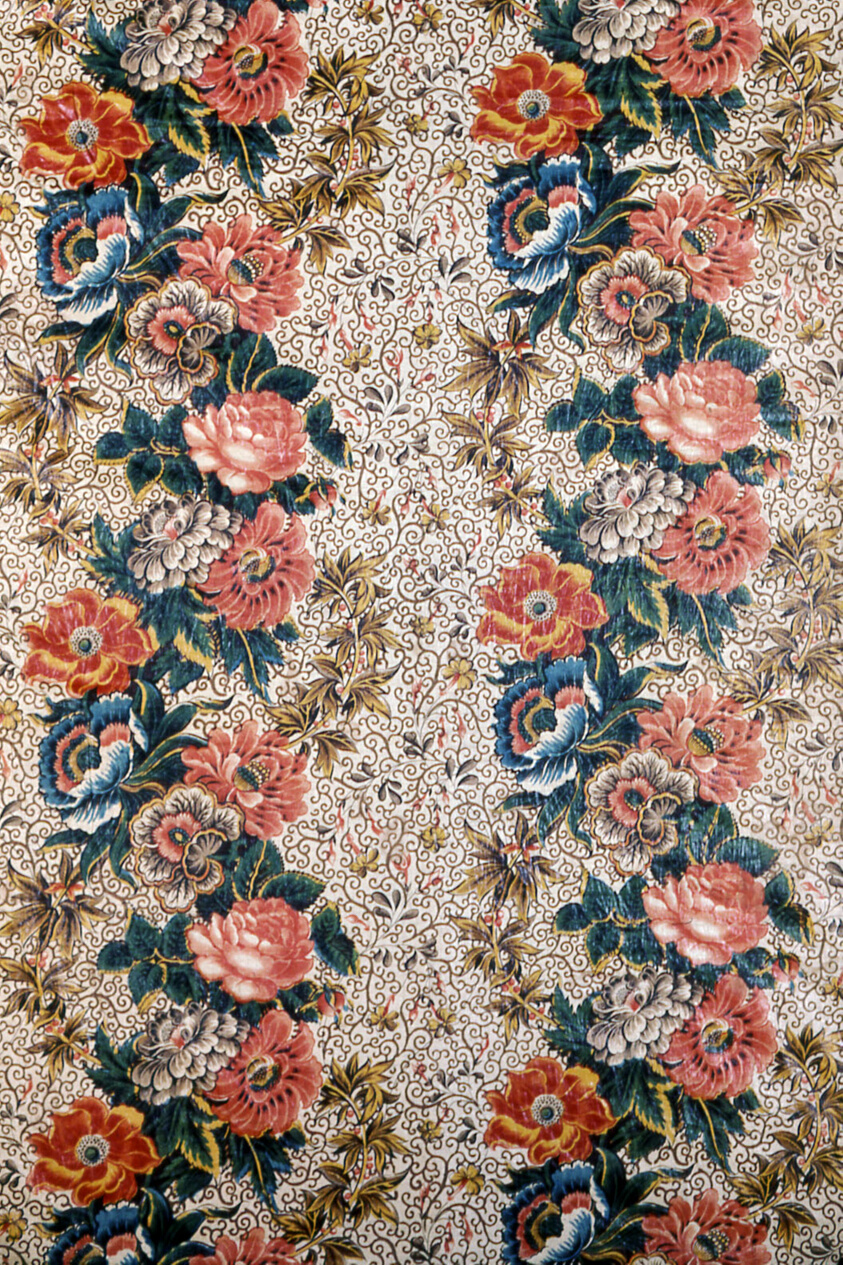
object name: Textile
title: Panel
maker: England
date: 1830/50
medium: Cotton, plain weave; printed; glazed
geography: England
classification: textile; weaving - printed